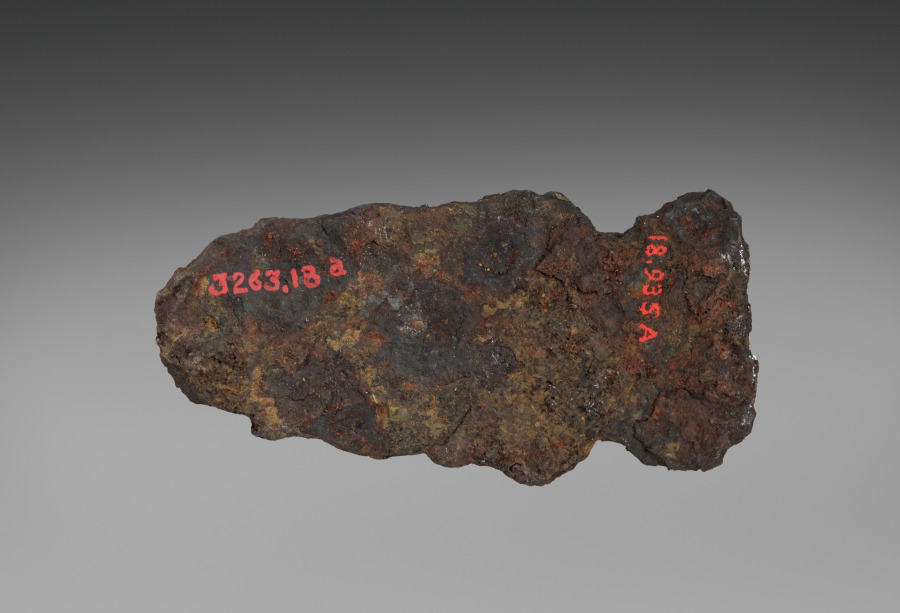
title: Buckle (clasp)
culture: Merovingian, Burgundian, Migration period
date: 600s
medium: iron with silver overlay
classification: Jewelry